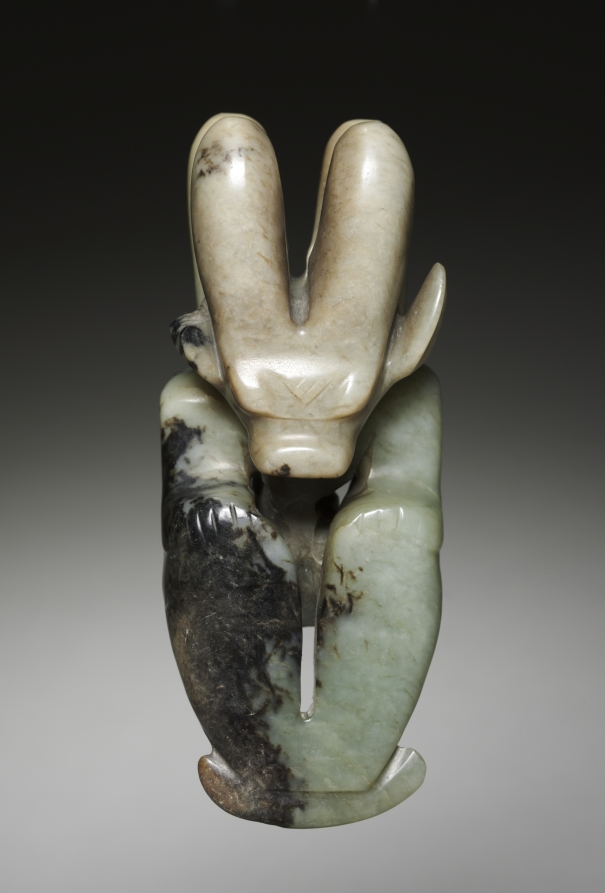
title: Amulet in the Form of a Seated Figure with Bovine Head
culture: Northeast China, Neolithic period, probably Hongshan culture (4700–2920 BCE)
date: c. 4700–2920 BCE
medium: jade (nephrite)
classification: Jade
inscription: There are two paper labels on the back of the jade pendant: one partial label with Chinese characters and one with the typed number "150".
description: With a bovine head and four horns, this seated figurine was a powerful ritual and shamanic symbol. Drill holes above its shoulders form two interconnected perforations for suspension, suggesting that the jade was originally used as a pendant, presumably by the shaman performing the tasks of journeying to and communicating with the supernatural realms.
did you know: CMA daringly acquired this masterpiece without knowing exactly what it was. Only after Chinese archaeologists started excavating similar jades in Northeast China could it be attributed to the Hongshan culture.